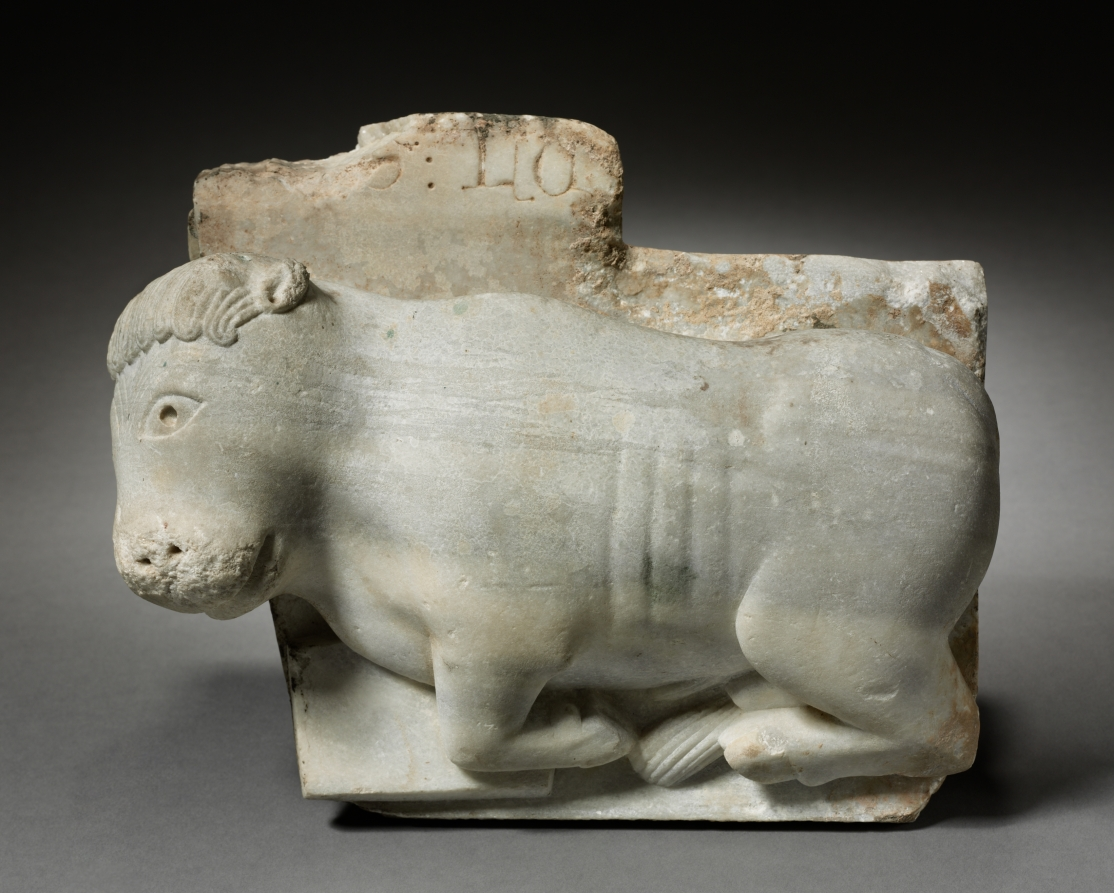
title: Fragment of a Capital with the Ox of Saint Luke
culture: Northern Italy, Emilia (Bologna?), 12th century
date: c. 1175–1200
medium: marble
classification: Sculpture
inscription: above the profile ox: S. LU.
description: This fragment and two other capitals (1972.20 and 1972.21) were once parts of the same structure. Though the original structure is unknown, their style suggests that it was located in Bologna. As the fragmentary Latin inscription S: LU suggests, the ox represents the traditional symbol in medieval art of the Evangelist Saint Luke.